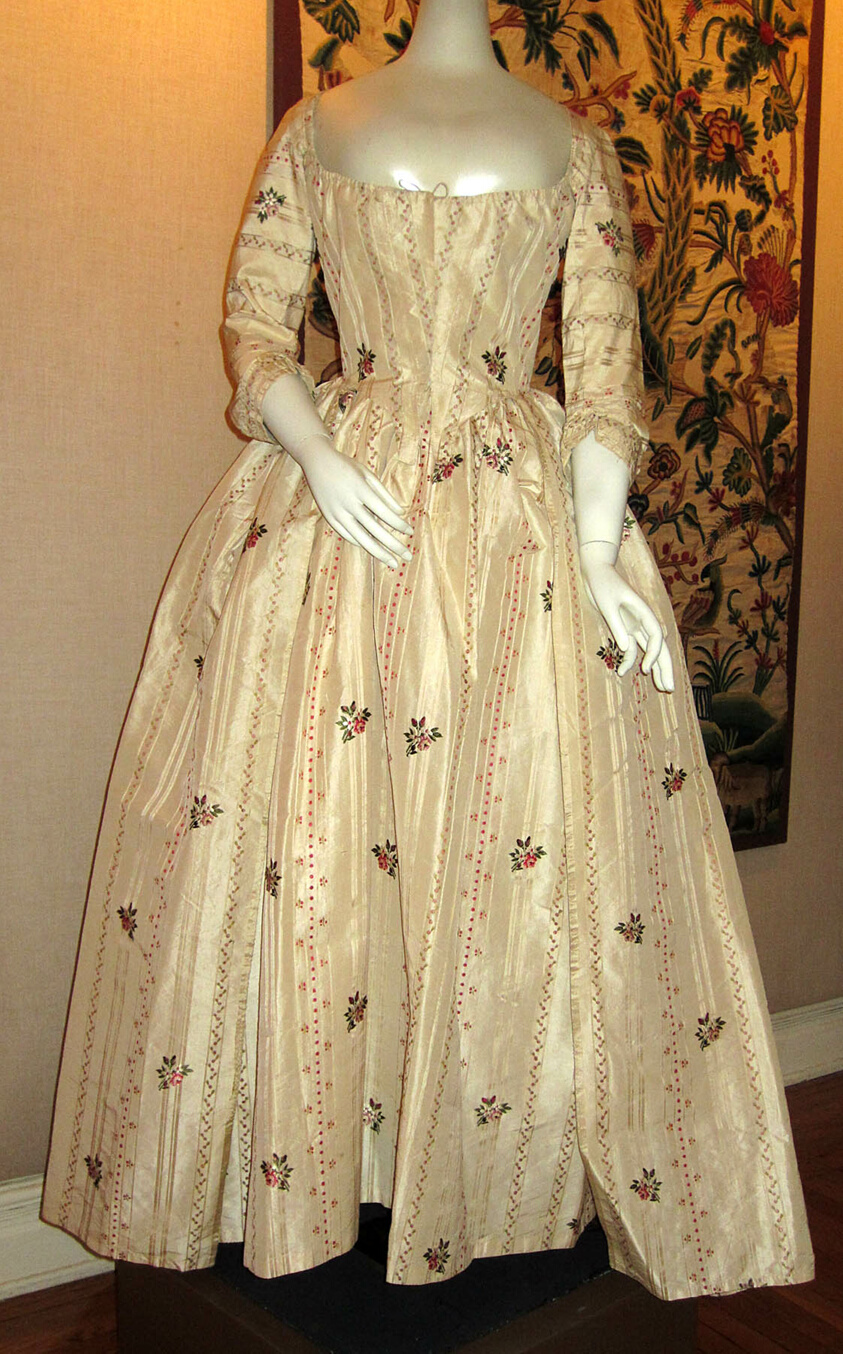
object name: Textile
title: Overgown and Petticoat (Robe à l'anglaise)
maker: England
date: 1765/85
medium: Silk, plain weave and strips of satin weave with supplementary patterning warps and supplementary brocading wefts; overgown lined with linen, plain weave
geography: England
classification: textile; costume - weaving; weaving; costume